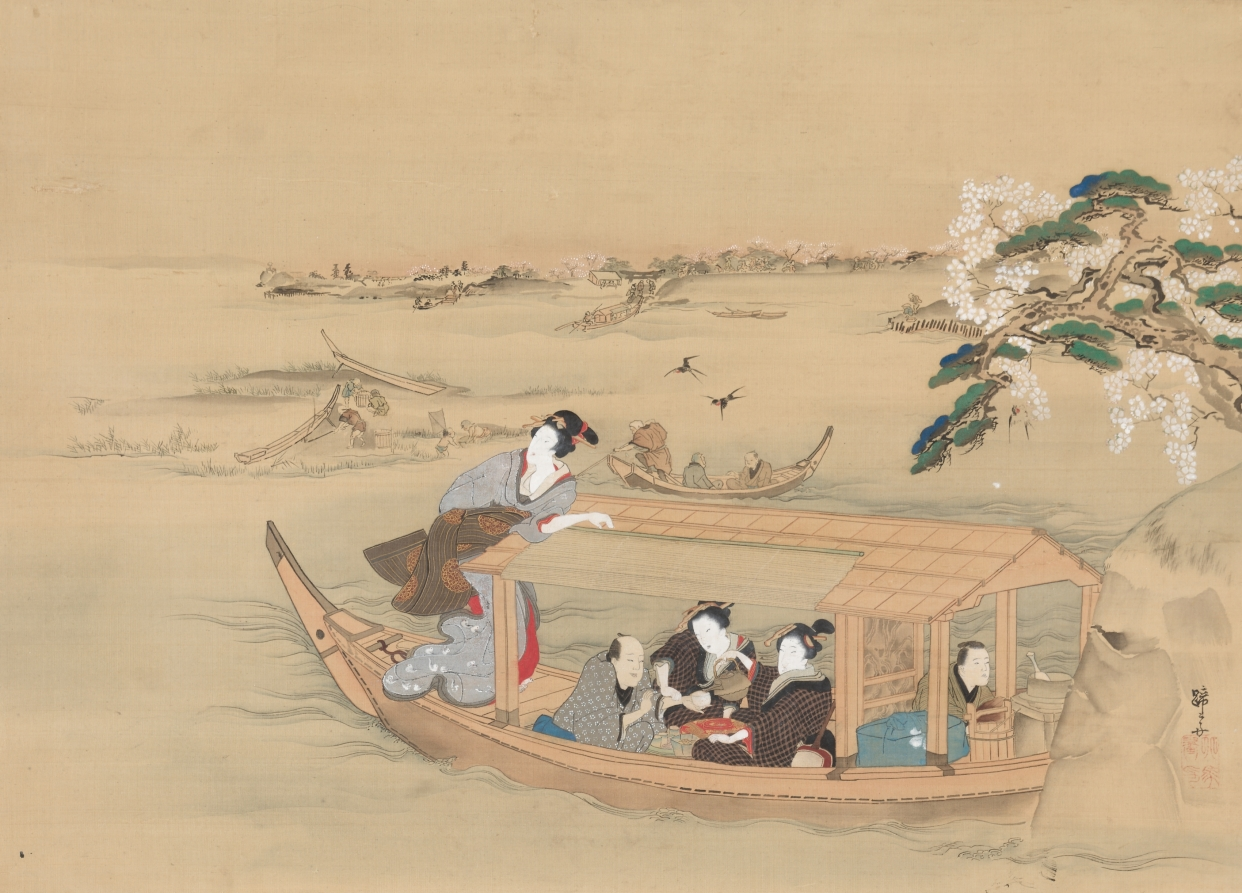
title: Pleasure Boat on the Sumida River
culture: Japan, Edo period (1615–1868)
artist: Teisai Hokuba (Japanese, 1771–1844)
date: 1800s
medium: Hanging scroll; ink and color on silk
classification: Painting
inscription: Signed: Teisai. Sealed: Teisai go [no] in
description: After a major fire in Edo (now Tokyo), the Yoshiwara licensed brothel district was relocated to an area accessed via boat along the Sumida River, giving rise to many compositions depicting travel there. Here, attendants with checkered robes serve refreshment to a client. A figure at the fore of the boat tends to the kitchen. A courtesan at the aft, or rear, surveys the river scene. Acquaintances converse in modest commuter boats, and fishers put in to a tiny island. The boat is near the entrance to the San’ya Canal, where pleasure-seekers would disembark.